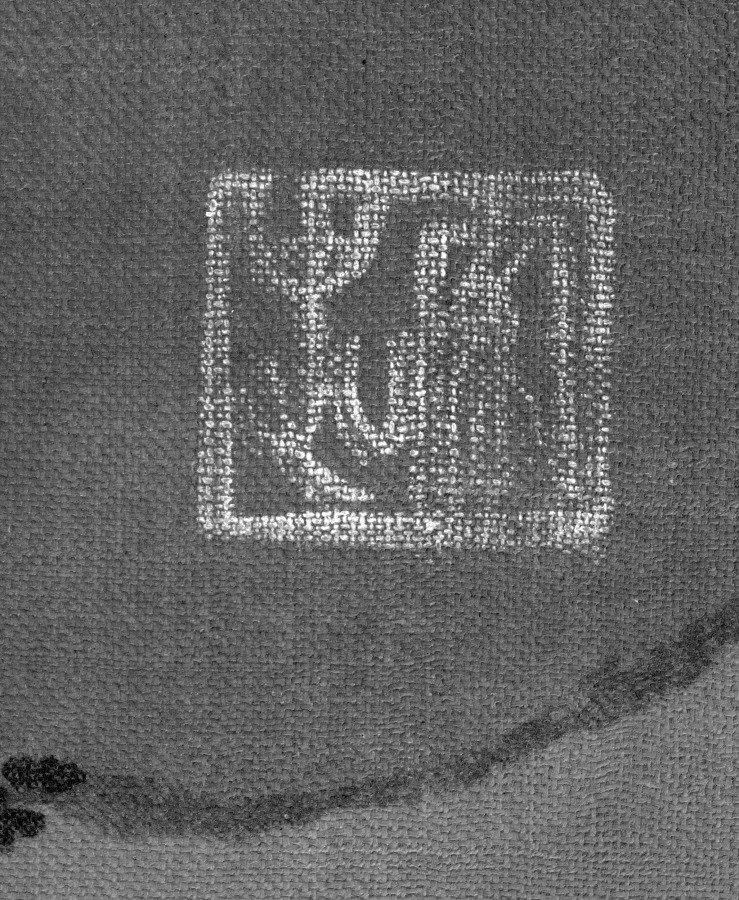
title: Landscape with Fishermen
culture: Korea, Joseon dynasty (1392–1910)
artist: attributed to Yi Bul-hae (Korean, active 1500s)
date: 1600s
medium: hanging scroll; ink and slight color on silk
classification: Painting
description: Clad in a straw rain poncho and wide-brimmed hat, a fisherman is seated in a small boat. Reeds sparkle on the far shoreline among dark, black rock forms that appear to float above the water. On the near shoreline are a pair of pines, a grove of bamboo or water reeds, and two withered deciduous trees from which moss hangs. This landscape painting, which emphasizes an intimate solitary moment through evoking various atmospheric elements—rain, evening light, and frosty air—was one of the main subjects of mid- and late 16th-century landscape paintings.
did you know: This landscape painting emphasizes an intimate solitary moment by evoking various atmospheric elements: rain, evening light, and frosty air.